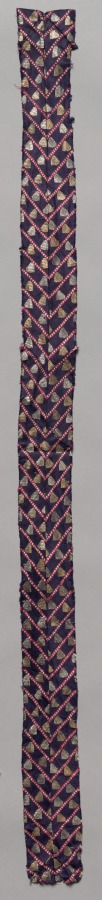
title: Fragment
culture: India, 19th century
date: 1800s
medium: brocade; silk and metal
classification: Textile